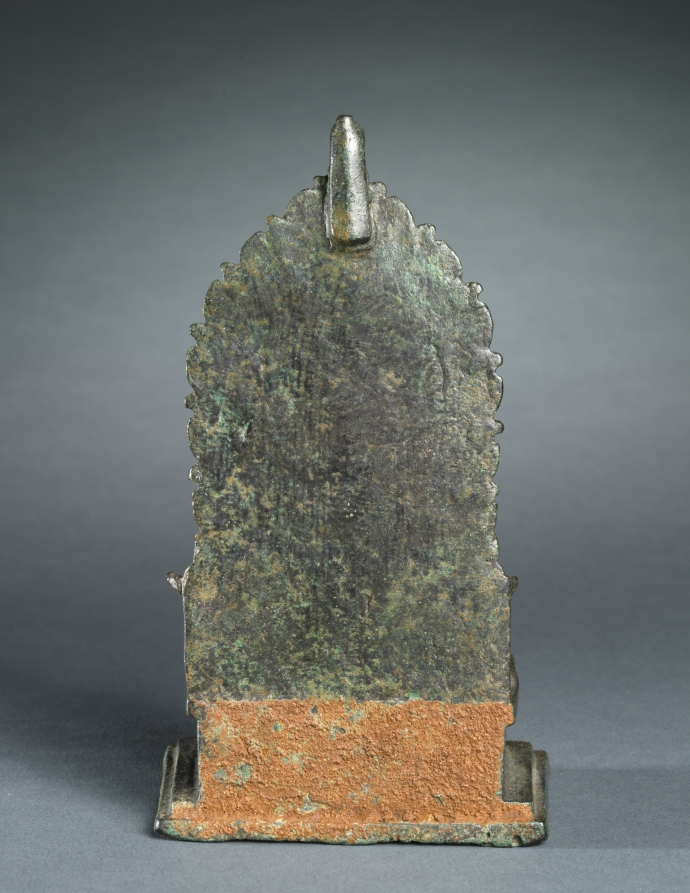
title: Seated Avalokitesvara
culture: Central Java, 9th century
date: 800s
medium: bronze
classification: Sculpture